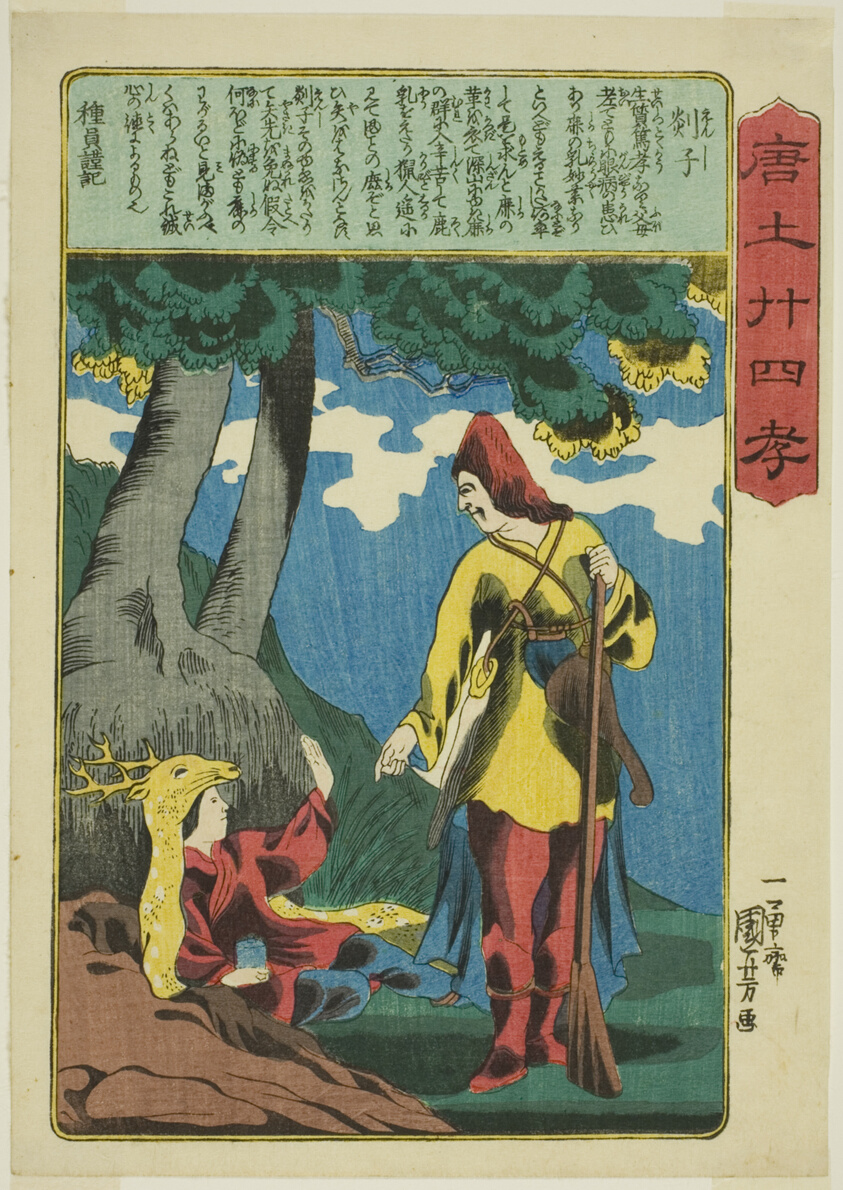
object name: Print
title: Tanzi (Enshi), from the series "Twenty-four Paragons of Filial Piety in China (Morokoshi nijushiko)"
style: Japanese (culture or style)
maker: Utagawa Kuniyoshi (Japanese, 1797-1861)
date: c. 1848/50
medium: Color woodblock print; chuban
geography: Japan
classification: woodblock print; print; asian art